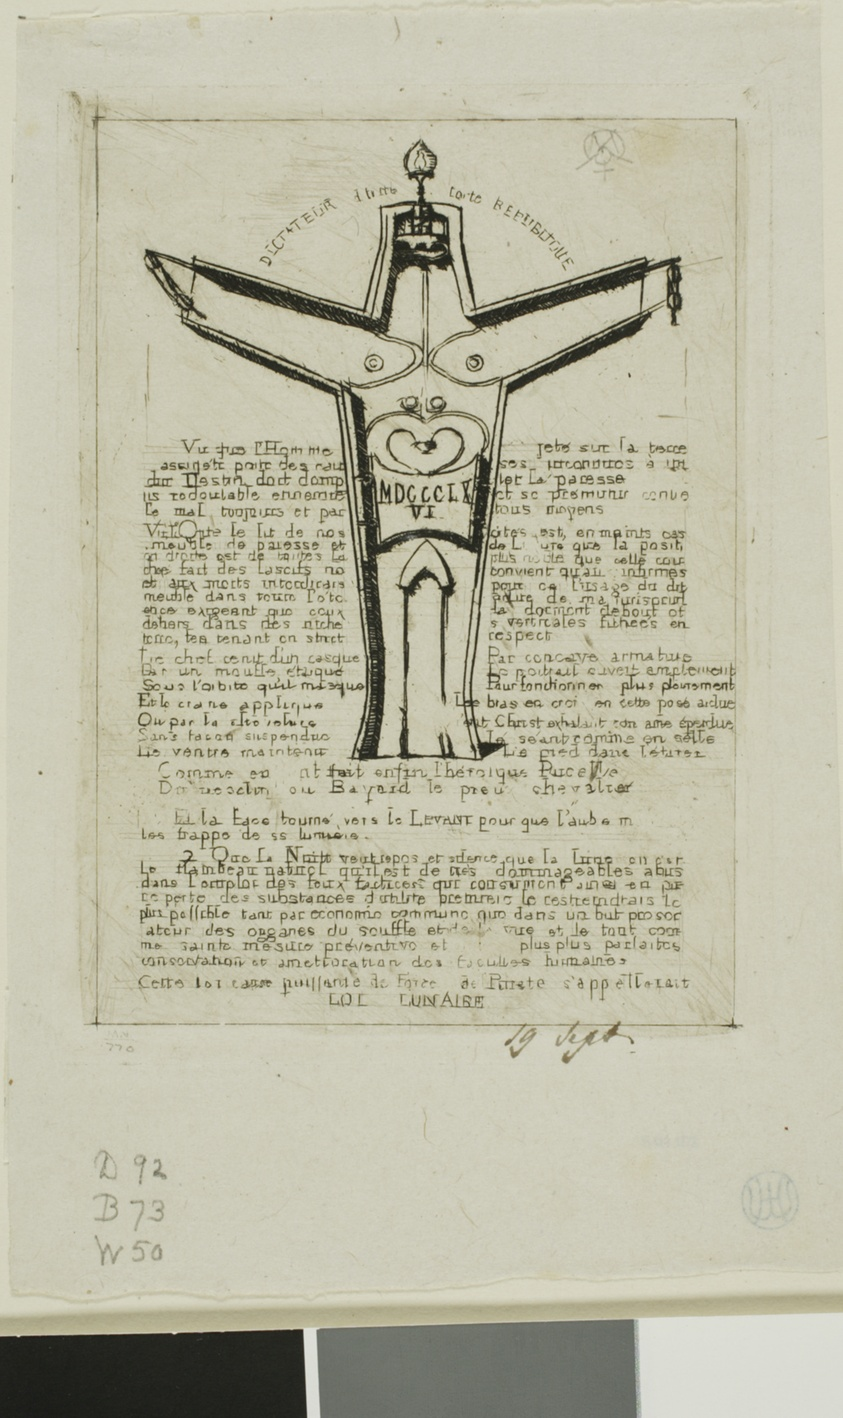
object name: Print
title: Lunar Law, No. 2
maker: Charles Meryon (French, 1821-1868)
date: 1866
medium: Etching with chatter and scraping in warm black on ivory laid paper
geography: France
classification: etching; print; prints and drawing